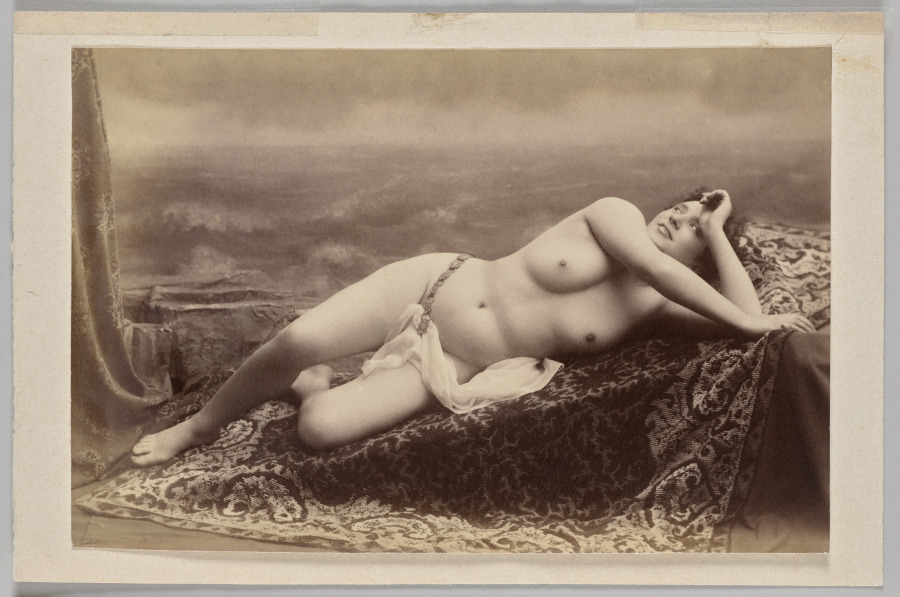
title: Untitled (reclining nude on carpet against painted backdrop of waves)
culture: Unknown, 19th century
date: 1870s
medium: albumen print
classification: Photograph